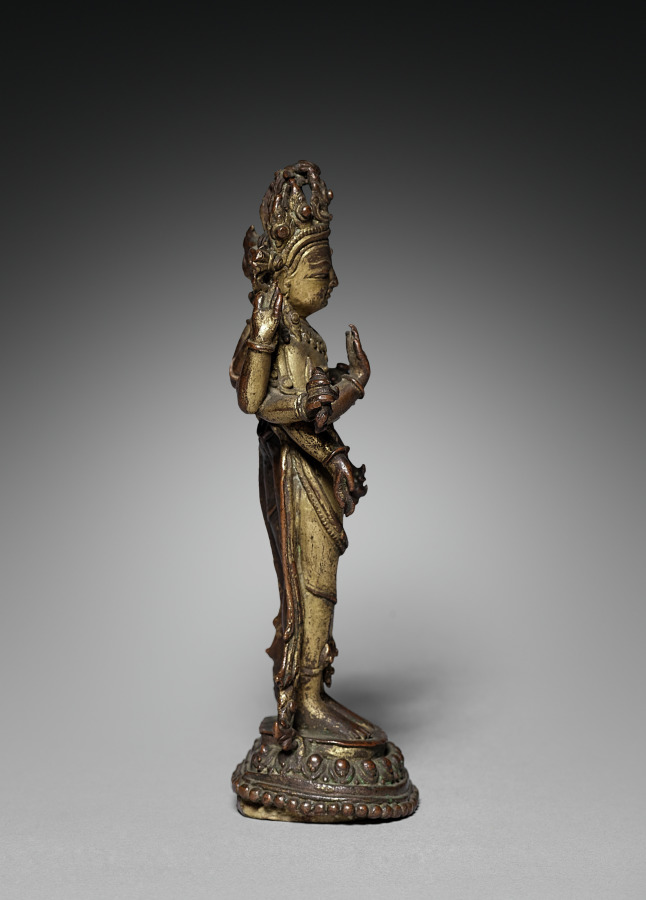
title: Lokesvara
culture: Nepal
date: 1600s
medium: gilded copper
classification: Sculpture